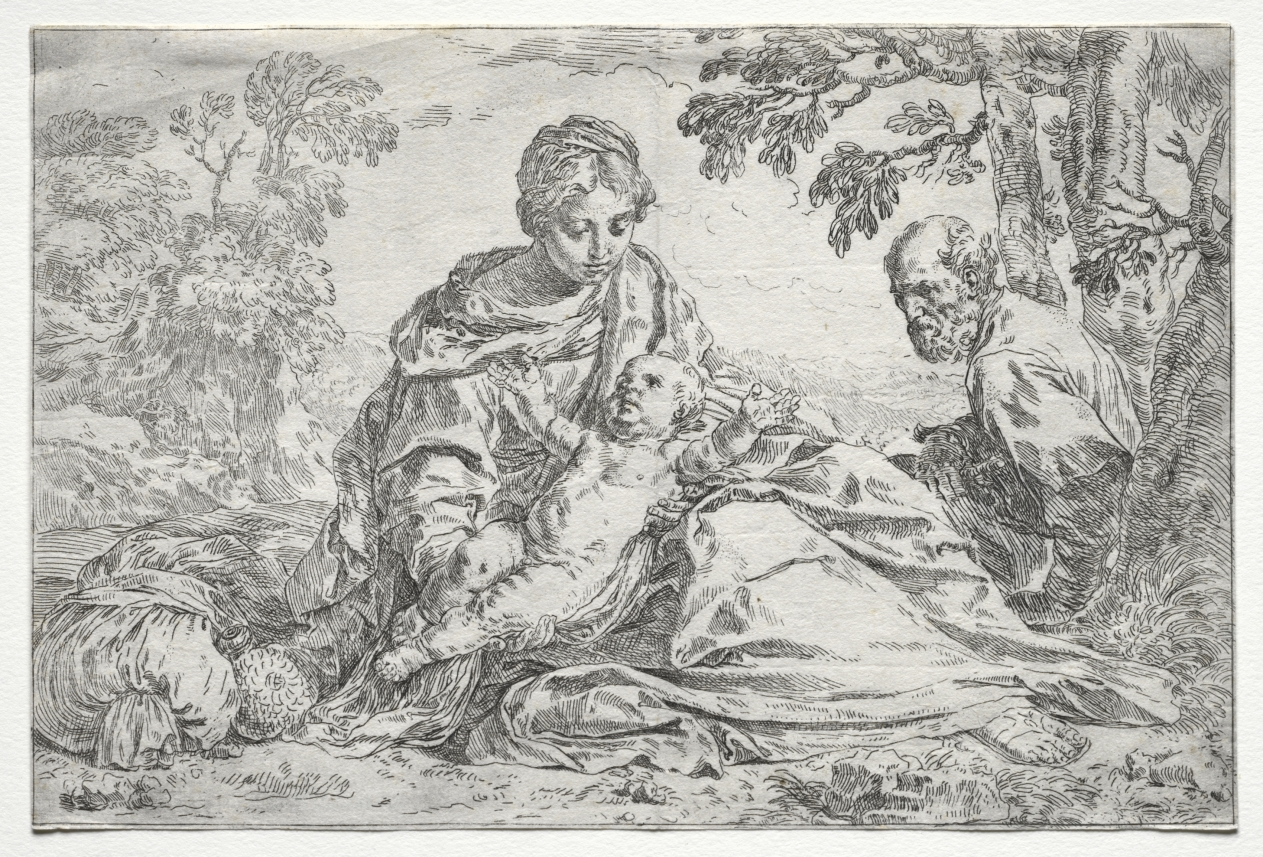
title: Rest on the Flight into Egypt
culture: Italy, 17th century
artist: Simone Cantarini (Italian, 1612–1648)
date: 1632–48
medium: etching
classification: Print